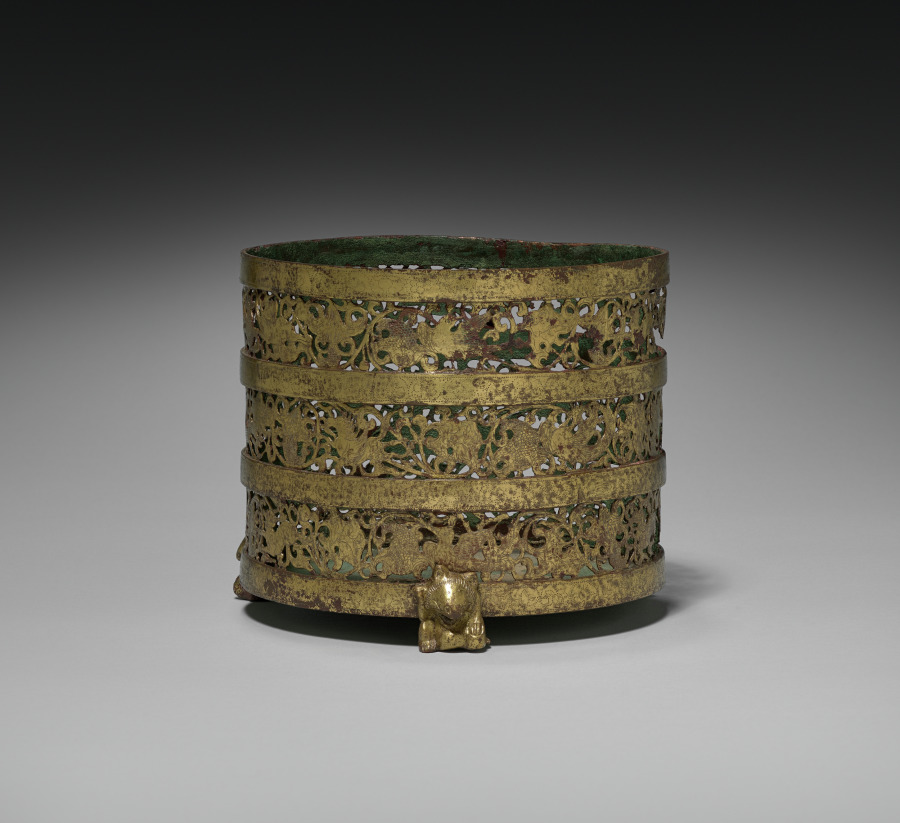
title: Cylindrical Container with Cover (Lian)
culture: China, Han dynasty (202 BCE–220 CE)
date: 100 BCE–100 CE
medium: gilt bronze with openwork and chased designs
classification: Metalwork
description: This magnificent gilded bronze vessel with openwork decoration shows all kinds of fabulous creatures, real and imaginary, chasing each other among swirling scrolls. There is an emphasis on the unbroken rhythms of movement, rather than the ferocity of animals in combat. Cylindrical bronze vessels in this shape, called lian, were often used as cosmetic boxes.